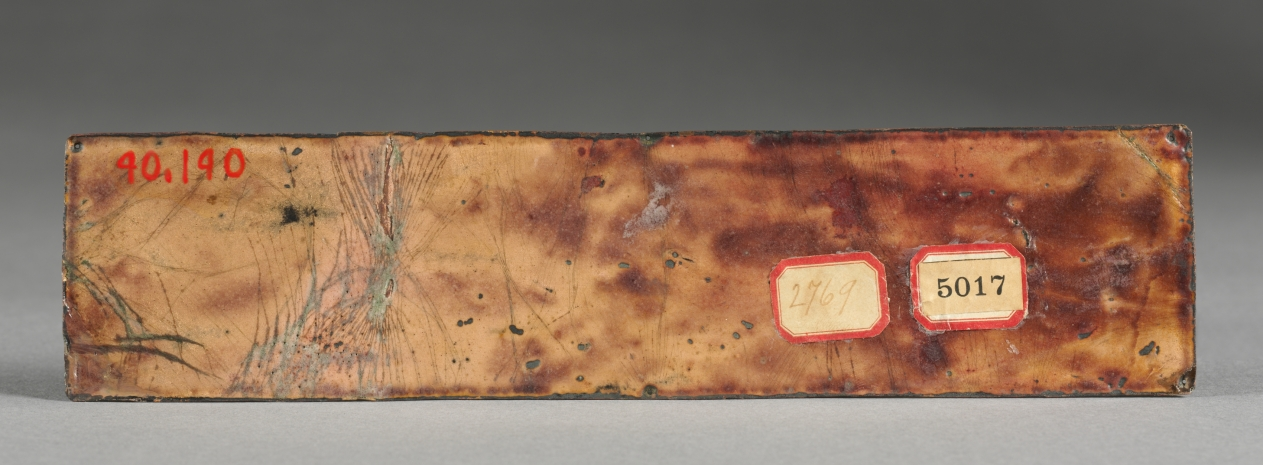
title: Plaque Depicting a Scene from the Aeneid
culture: France, Limoges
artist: Jean II Pénicaud (French, c. 1520–1588)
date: 1500s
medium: painted enamel (grisaille) on copper with gilding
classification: Enamel